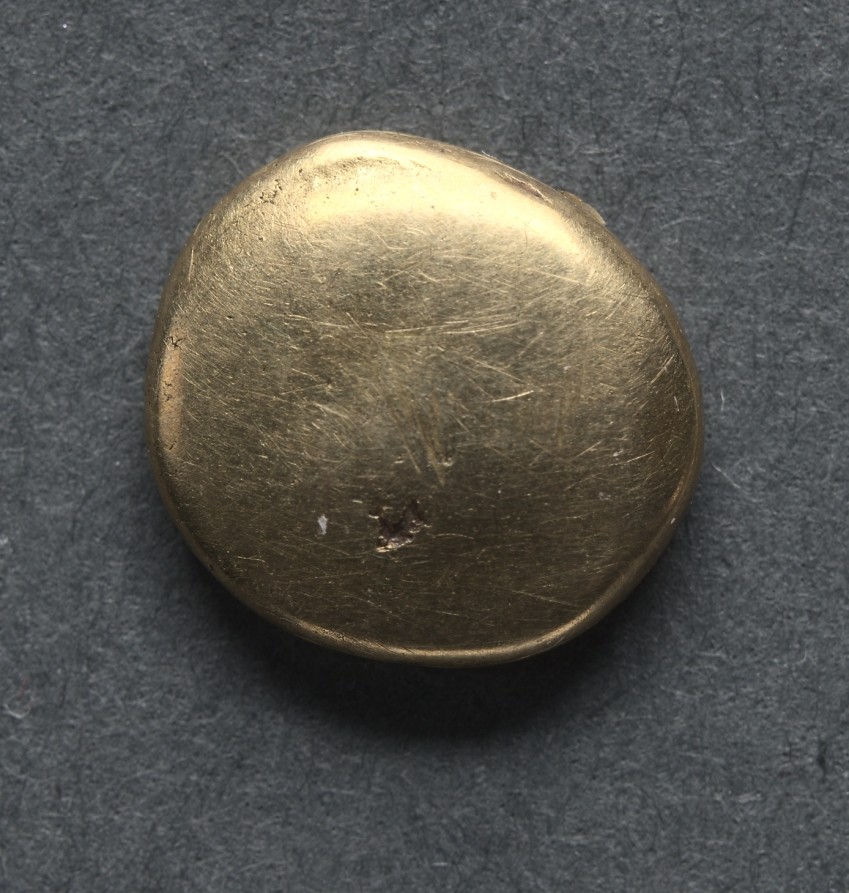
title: Quarter Stater: Plain Field (reverse)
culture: England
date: c. 125–20 BCE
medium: gold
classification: Coins